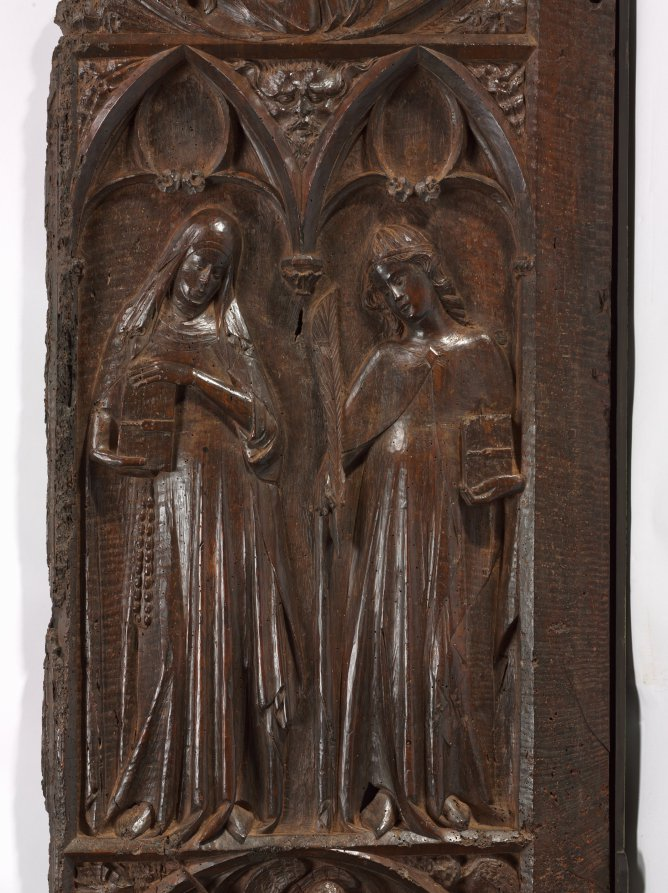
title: Panel from a Choir Stall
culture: Spain, Catalonia, Monastery of Pedralbes, 14th century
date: c. 1330–1340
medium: walnut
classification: Furniture and woodwork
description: The large panel shown here was probably the end panel of a stall that faced another across the choir of a Gothic church. The panel is carved with the figure of St. Francis of Assisi kneeling in prayer and receiving the stigmata. Two standing figures also appear on this panel: a nun at the left (perhaps St. Claire) and a female martyr at the right. Below is St. Michael and the dragon.